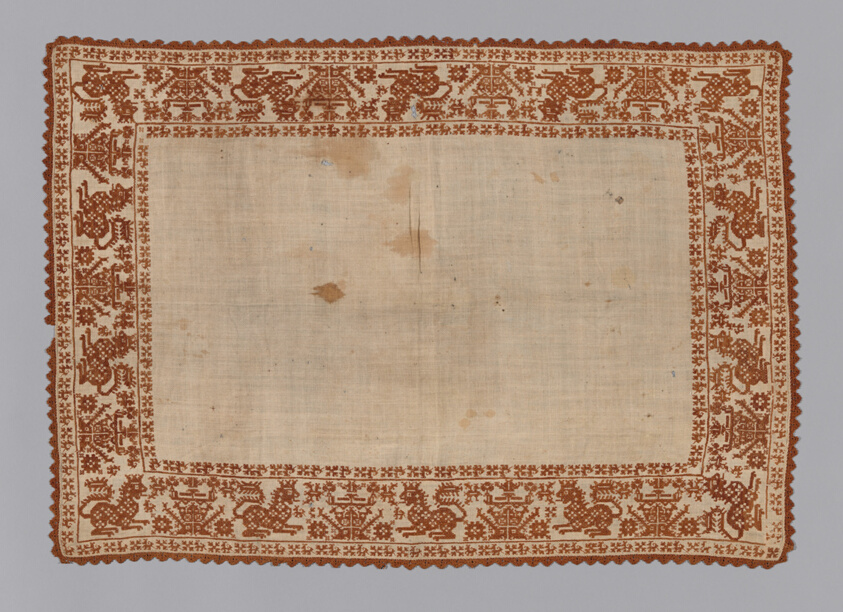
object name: Textile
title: Cover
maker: Italy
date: 1601/50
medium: Linen, plain weave; embroidered in double running, hem and two-sided Italian cross stitches; edged with bobbin straight lace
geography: Italy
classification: textile; needlework (visual works)